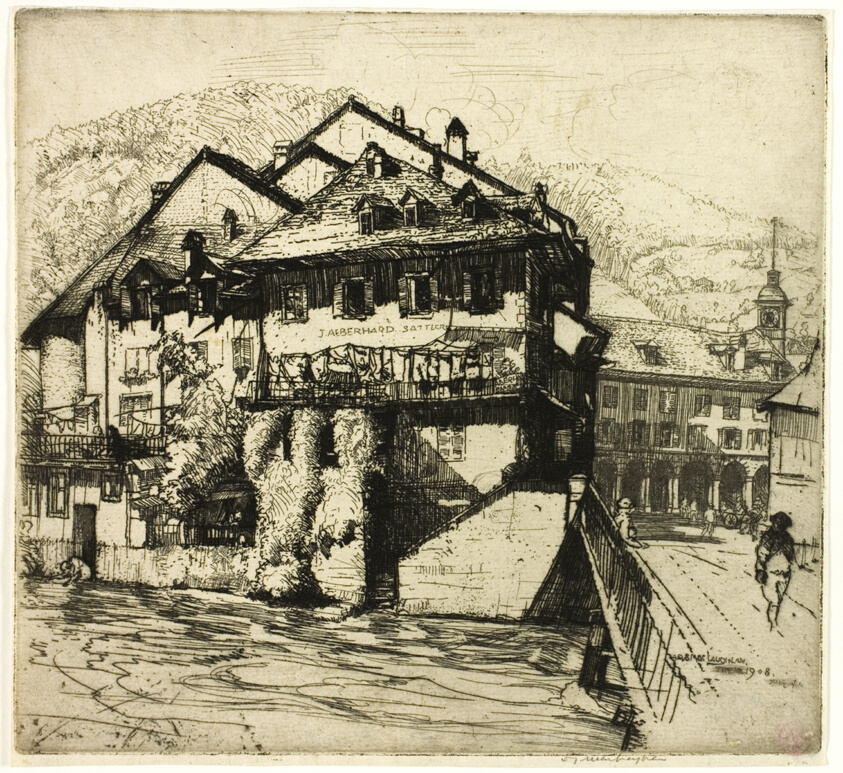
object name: Print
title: Houses on the Aare, Switzerland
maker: Donald Shaw MacLaughlan (American, born Canada, 1876-1938)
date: 1908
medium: Etching in black on cream laid paper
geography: United States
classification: etching; print; prints and drawing